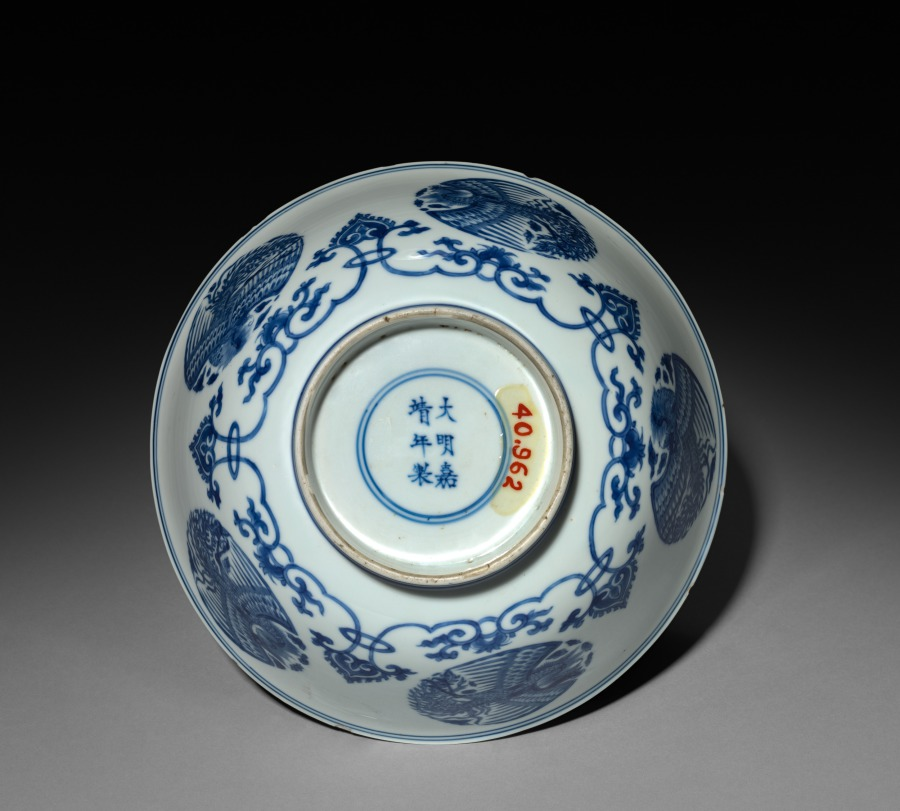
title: Bowl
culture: China, Qing dynasty (1644-1911), Kangxi reign (1661-1722)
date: 1662–1722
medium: porcelain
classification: Ceramic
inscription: 大明嘉靖年製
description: The apocryphal inscription in a double circle on the base reads "made in the Ming dynasty, Jiajing period," but the bowl was made during the reign of the Qing emperor Kangxi.